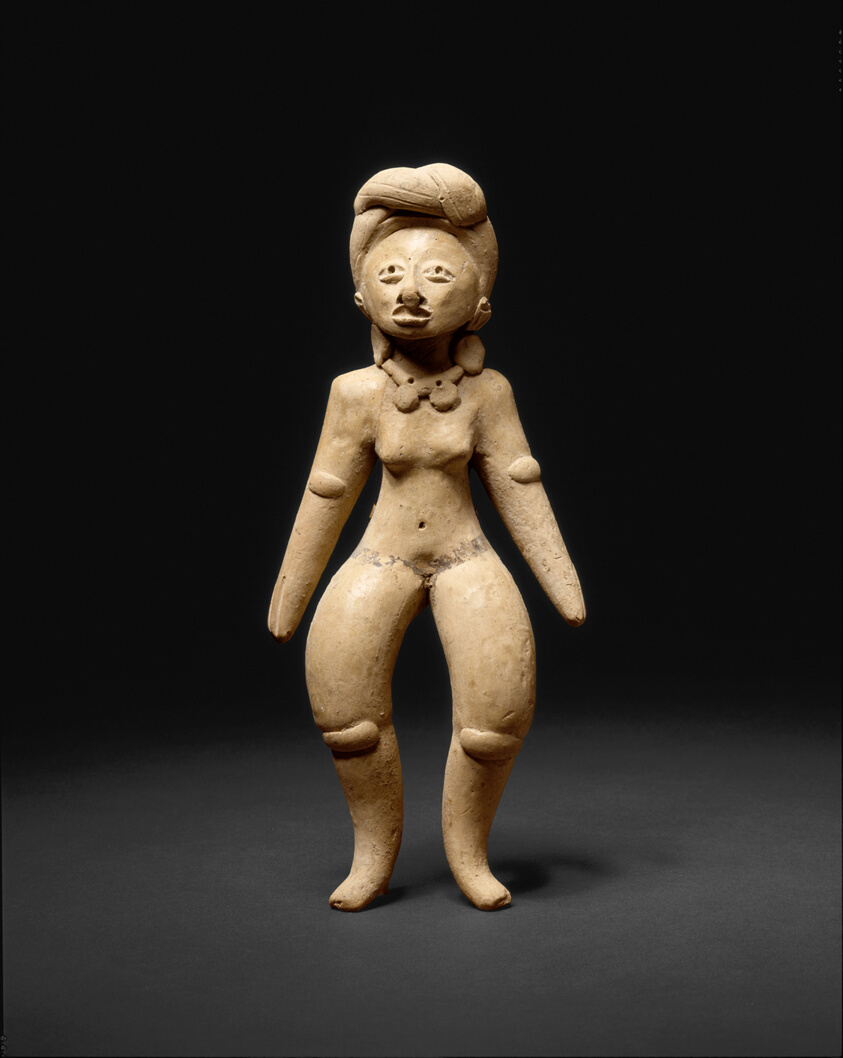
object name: Sculpture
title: Female Figurine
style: huastec, native american, americas, mesoamerican, veracruz, Arts of the Americas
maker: Huaxtec; Pánuco River Valley, northern Veracruz, Mexico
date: 800–1400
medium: Ceramic and pigment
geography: Veracruz state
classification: earthenware; art of the americas; ceramics; sculpture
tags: people, female